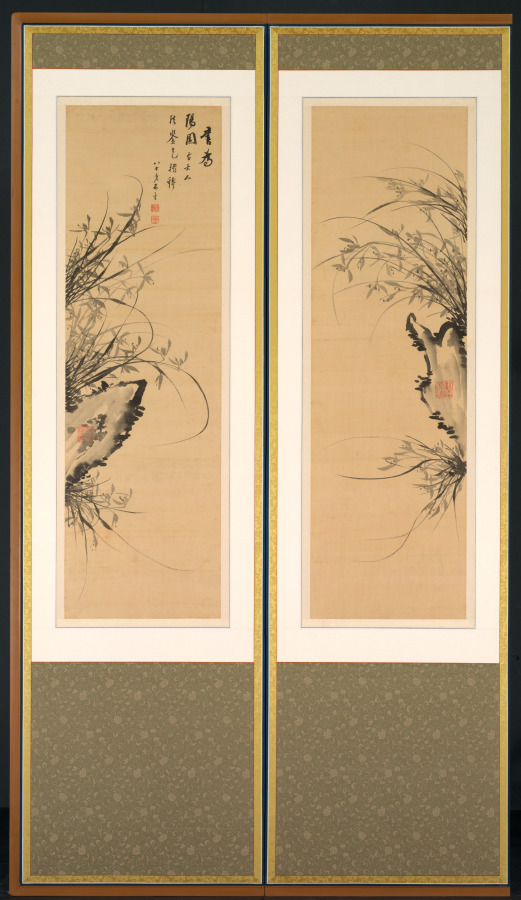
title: Orchids and Rocks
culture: Korea, Joseon dynasty (1392–1910)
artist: Yi Ha-eung (Korean, 1820–1898)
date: 1897–98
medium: Eight-panel folding screen; ink on silk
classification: Painting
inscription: Translation: [I] painted for the high minister Yangwon. [I] humbly request your corrections and advice [on my painting]. [By] an eighty-year old gentleman of rocks.)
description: Yi Ha-eung (1820−1898), the artist of this eight-panel folding screen, was one of the most influential men in late 19th-century Korea. Acting as the regent for his son, King Gojong (1852−1919), who ascended the throne at the age of thirteen, Yi ruled Korea from 1866 to 1873. In addition to his illustrious political career, Yi was also recognized as one of the most celebrated artists who led the revival of literati art in late 19th-century Korean art. In particular, he was recognized as the master of orchids, one of the “Four Gentlemen” (plum, orchid, chrysanthemum, and bamboo) themes. Solely relying on monochrome ink, Yi depicted the curvilinear silhouettes of cymbidium orchid leaves dramatically hanging down from cliffs. Growing in wilderness and redolent with fragrance, orchids were often associated with the perseverance of principled gentlemen, and thus became one of the most popular subjects of scholar-artists' paintings.On the upper right corner of the far left panel, Yi wrote a short inscription stating that he painted the work at the age of 80.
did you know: The artist of this elegant painting is the formidable politician Yi Ha-eung (1820–1898), who is known for a seclusion policy that aimed to protect Korea and its sovereignty from foreign influences.